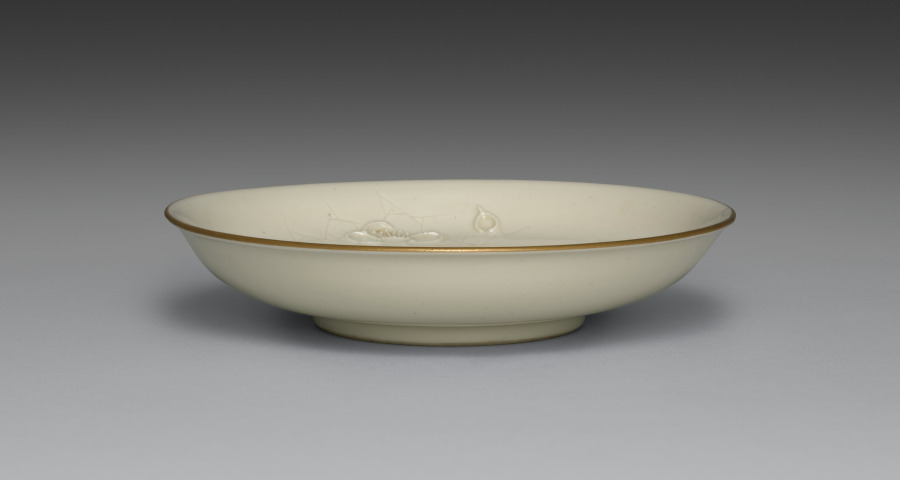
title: Medium-sized Dish from Dining Set with Plum Blossoms and Cracked-Ice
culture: Japan, Meiji period (1868–1912)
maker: Seifū Yohei II (Japanese, 1844–1878)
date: c. 1875–78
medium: Porcelain with molded designs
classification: Ceramic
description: Each item in this set has a delicate low-relief design of flowering plum branches over scattered, intersecting lines meant to resemble the cracked-ice surface of a frozen body of water and is signed on the base in gold pigment. While Yohei II produced many fine works in underglaze blue, like those produced by Kiyomizu Shichibei, he also made works in quite different styles later in his career, from the early 1870 s. In 1873, he was appointed purveyor to the Industrial Center of Kyoto Prefecture, a designation associated with Kyoto’s efforts to reach an international market through the port of Kobe; and from 1875 until his death, he was involved in national-level projects to present Japanese ceramics across the world. It was during this period that Yohei III was apprenticed to Yohei II, and it has been suggested that this set may in fact be an early example of Yohei III’s work, which he signed with his teacher’s name. Decorated with flowers resembling Japanese textile motifs, the set calls to mind the design of Yohei II’s pair of vases with plum blossoms in the Victoria and Albert Museum. Here, the elaborate trees created for a formal public exhibition setting have been translated into the approachable blossoms of the genteel domestic environment. While the designs are consistent across the pieces, each raised flower petal and pistil and each incised line in the ice was done by hand, so the cups, bowls, and dishes are similar yet unique. The bottoms of two boxes once identified the set’s owner, but the information has been deliberately obscured with black ink. However, inscriptions still visible appear to indicate two occasions, once at the end of July 1886 , and once again in June 1916 , when parts of the set were requested from Hokura in Niigata Prefecture. The location corresponds to a neighborhood in the present-day city of Jōetsu. The surname Tsuji 辻 also appears on a paper tag affixed to one of the box cloths. Future research may possibly reveal more about their provenance. A vase by Yohei III in a private collection combines the formal grandeur of the Yohei II vases in the Victoria and Albert Museum with the gentler design of this dining set, placing flowering plum trees against soft, scalloped-edge clouds resembling those in golden screens.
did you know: The dining wares have a creamy white coloration that the four boxes containing them identify as Korean in style.